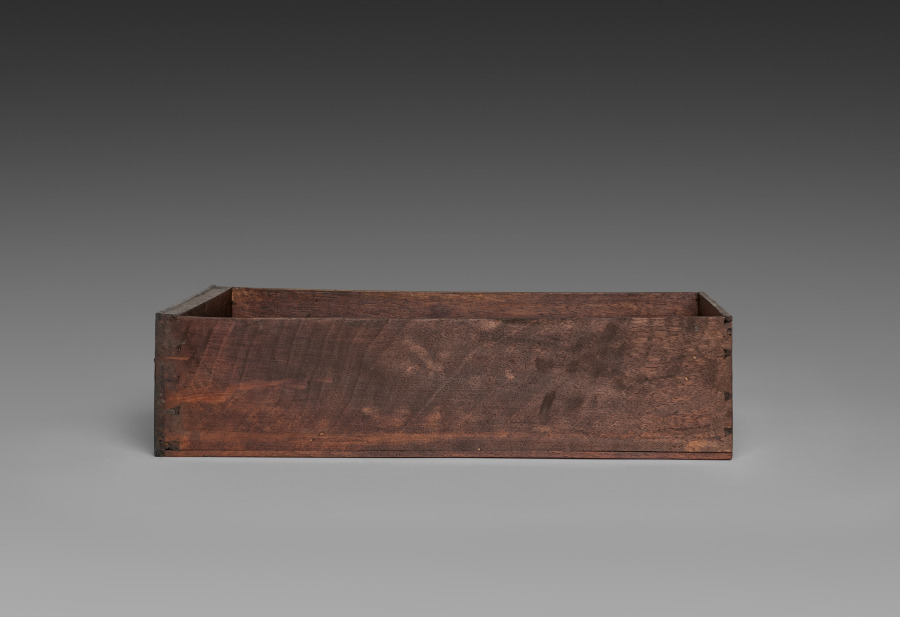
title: Interior Drawer for Cabinet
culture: France, late 17th Century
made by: André-Charles Boulle (French, 1642–1732)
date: c. 1690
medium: ebony, marquetry in metal and tortoiseshell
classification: Furniture and woodwork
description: Appointed cabinetmaker to King Louis XIV in 1672, André-Charles Boulle became a master of furniture making in France during the late 1600s until his death in 1732. Known primarily for his use of marquetry, in which metal patterns are inlaid into tortoiseshell then applied within the veneered surface of the furniture, Boulle established a level of quality and craftsmanship few others could achieve. As a result, his work found favor at the royal court and among other aristocrats and diplomats eager to impress the king. The inclusion of a medallion depicting Louis XIV within the bronze decoration of this chest would have identified the owner with the royal court. Often exhibiting stout architectural proportions with elegant groups of inlaid motifs such as the parrot on the central panel of this chest, Boulle’s designs are an example of the intellectual fashion for contrasting ideas, materials, and motifs.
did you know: Originally designed to sit atop an elaborate tall stand, this chest was likely altered in the late 1700s to reduce its scale and height.